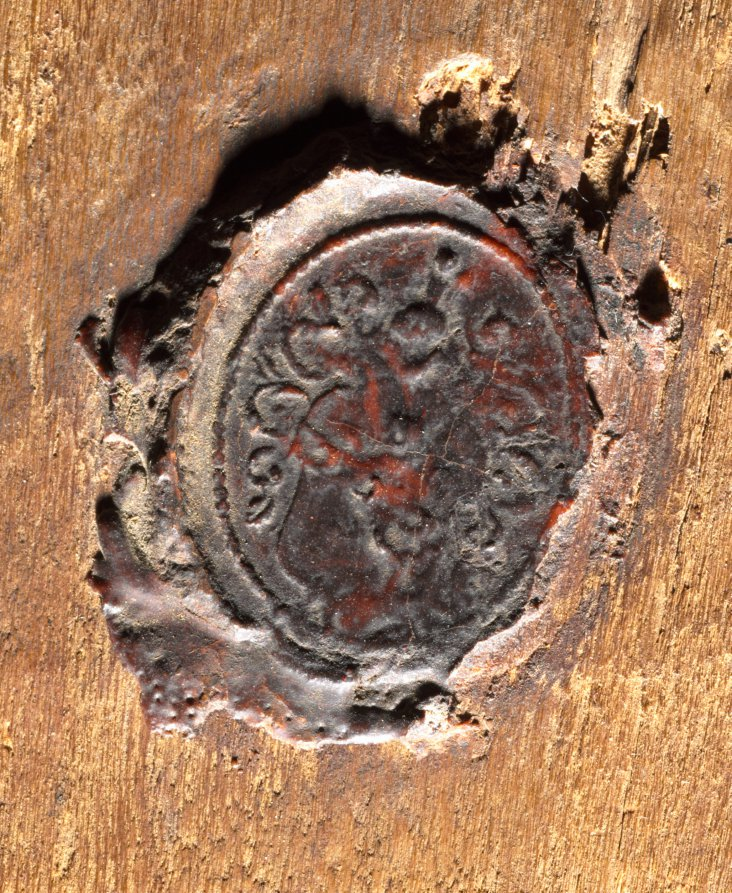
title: Icon of the Mother of God and Infant Christ (Virgin Eleousa)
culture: Republic of Venice, Kingdom of Candia, Candia (Heraklion, Crete, Greece) or Byzantine Empire, Constantinople (Istanbul, Turkey)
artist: attributed to Angelos Akotantos (Cretan, died 1450)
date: c. 1425–50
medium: tempera and gold on wood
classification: Painting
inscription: None visible on obverse; unidentified inscriptions on reverse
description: This large icon of a tender embrace between the Virgin Mary and Christ likely hung on a Greek Orthodox church’s iconostasis, a screen separating the congregation from the altar-containing sanctuary, which only clergy could enter. A skilled painter of faces and draperies, Angelos Akotantos was among Crete’s most sought-after artists. Based in Byzantium’s artistic center in his hometown of Candia, he painted for imperial clients and beyond. Despite theological differences, Cretan icons of Mary were popular in Ethiopia. In the early 1500s, Emperor Lebna Dengel sent monks Zekre and Pawli to acquire Cretan icons for him. Twenty-nine Cretan icons are still venerated (honored) in Ethiopian churches.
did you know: This is the only known work by Angelos Akotantos in the United States.